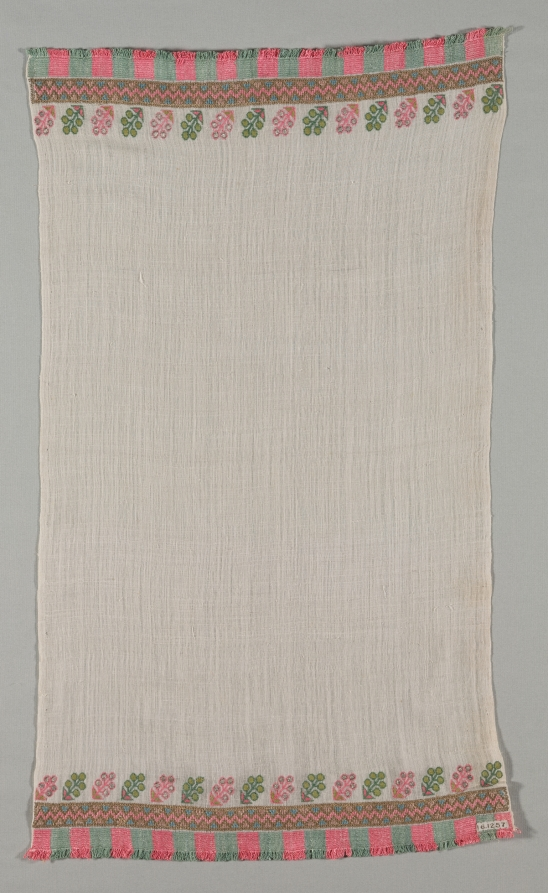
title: Embroidered Towel (Peshkir)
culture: Turkey, 19th century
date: 19th century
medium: embroidery: silk, gold and silver filé on linen tabby ground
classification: Embroidery